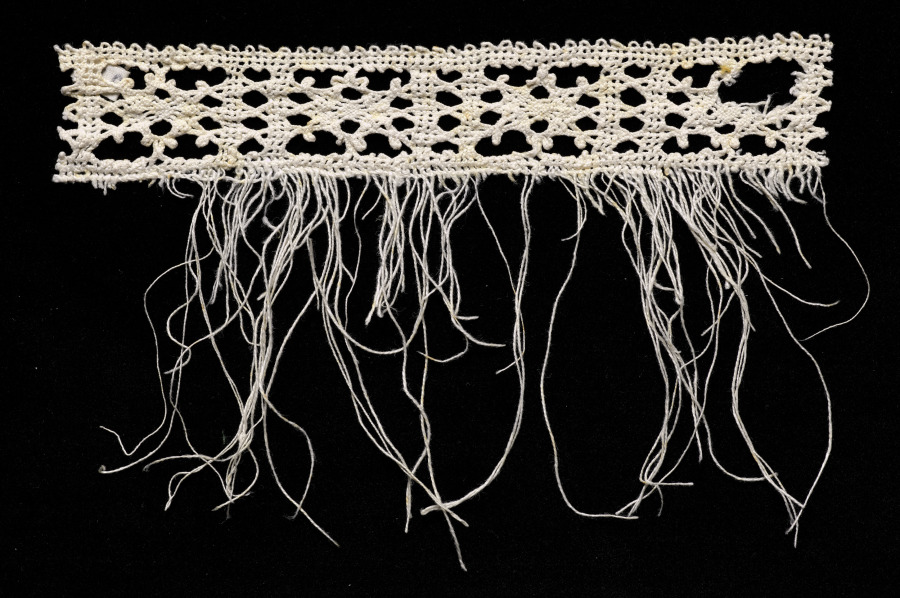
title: Lace Insertion with Fringe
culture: Italy, Venice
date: 1540–60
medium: Linen: bobbin lace (imitating afilatura) with fringe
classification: Lace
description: Although this fringed bobbin lace fragment is made of linen, its format is like those for laces made of gold, silver, and colored silk threads.